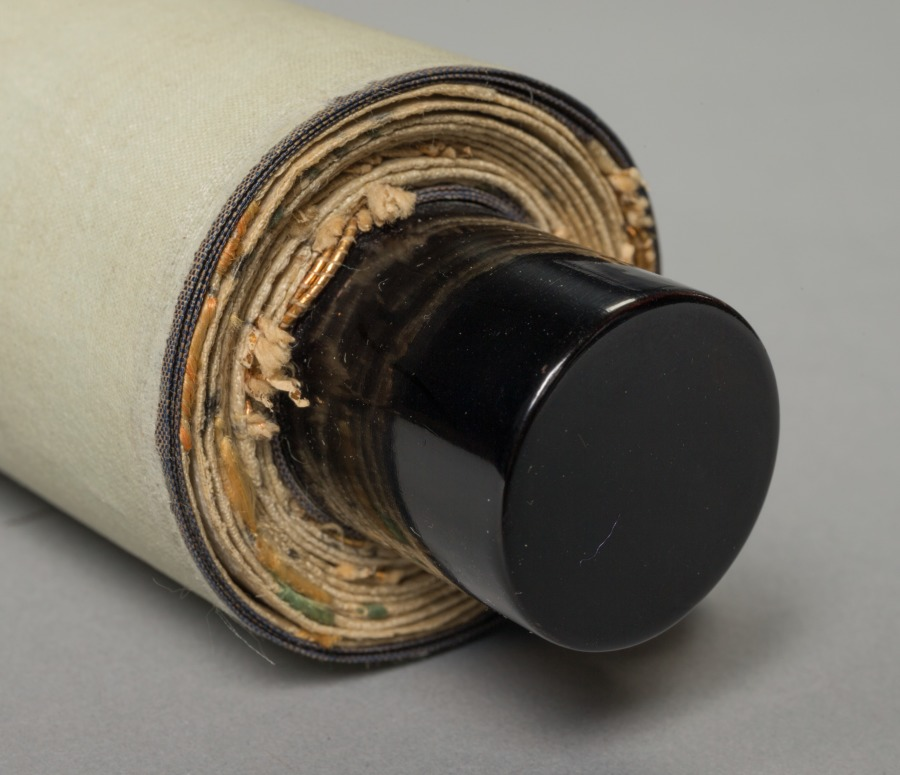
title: Courtesan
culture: Japan, Edo period (1615–1868)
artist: studio of Kaigetsudō Ando (Japanese, c. 1671–1743)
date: 1700s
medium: hanging scroll; ink and color paper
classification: Painting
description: Paintings of the courtesans who provided men with a sophisticated menu of appealing fashions, flattery, witty banter, music, dancing, and sexual services in the Yoshiwara district of the city of Edo (Tokyo) were the bread and butter of the Kaigetsudō studio, in whose style this work is painted. Their paintings emphasized bold, sweeping calligraphic ink lines in rendering the figures’ forms, along with high-contrast colors and patterns in their typically solitary subjects’ garments. Aside from the occasional prop or poem, the space around the dramatic figure was left entirely blank.